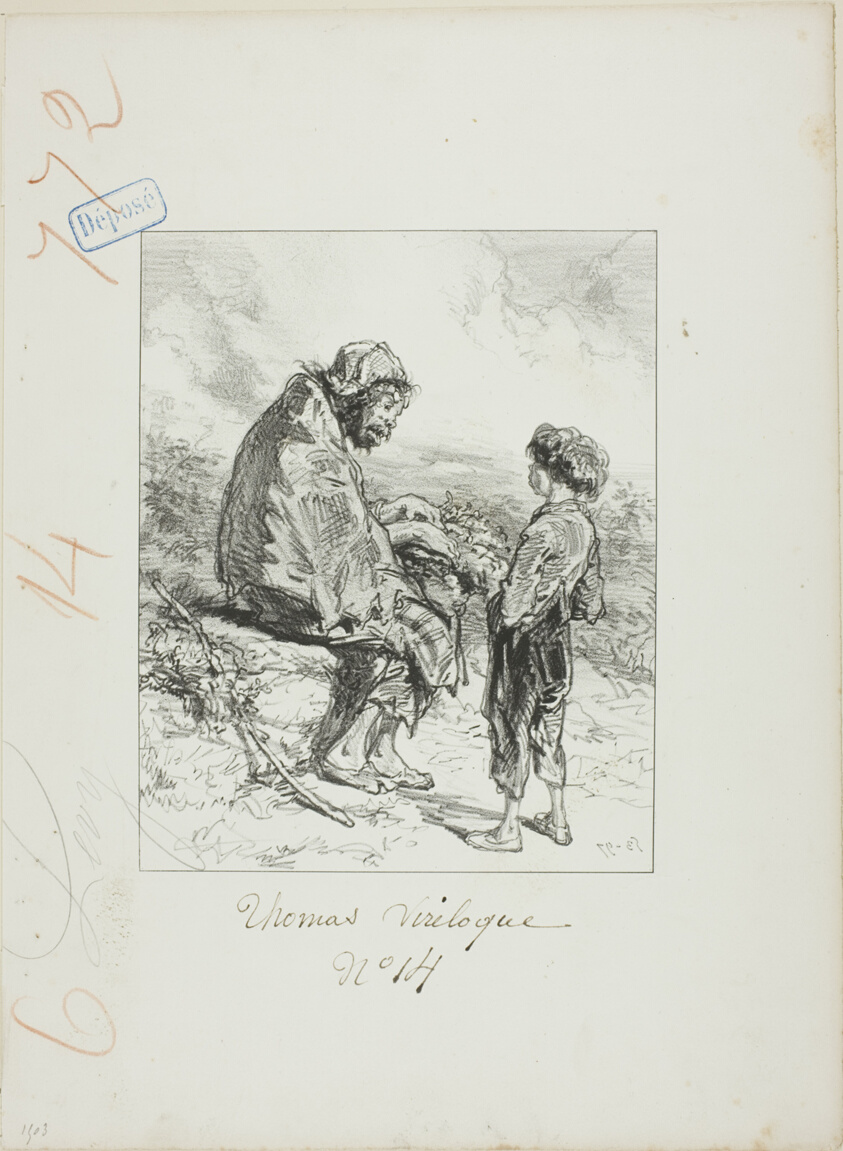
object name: Print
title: Les Propos de Thomas Vireloque: Not taught anything?-yet stupid already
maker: Paul Gavarni (French, 1804-1866)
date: 1853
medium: Lithograph in black on cream wove paper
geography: France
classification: lithograph; print; prints and drawing